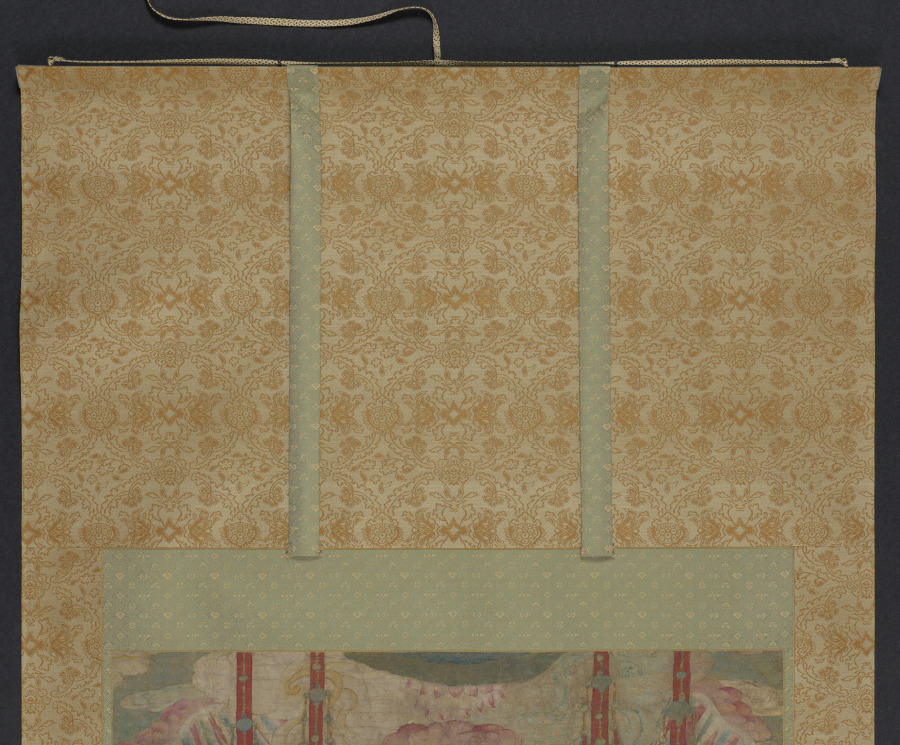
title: Seated Amitābha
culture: Chinese, Ming dynasty (1368-1644)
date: late 1500s–early 1600s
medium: hanging scroll; ink and color on silk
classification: Painting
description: This magnificent Buddha, called Amitābha (literally, “infinite light”) is seated on a lotus pedestal with both palms facing up over crossed legs, suggesting that it is in deep meditation. In contrast to the richly ornamented throne on which the Buddha is seated, the figure itself is devoid of any jewelry or decorative attributes, emphasizing its enlightened status and detachment from worldly affairs. The lion head in the center of the pedestal is a motif from Central Asia, which can also be seen in the halo or nimbus of Chinese Buddhist stone steles.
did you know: Originally, this scroll was acquired by the museum as a Korean work, but has now been tentatively reattributed as Ming period Chinese.